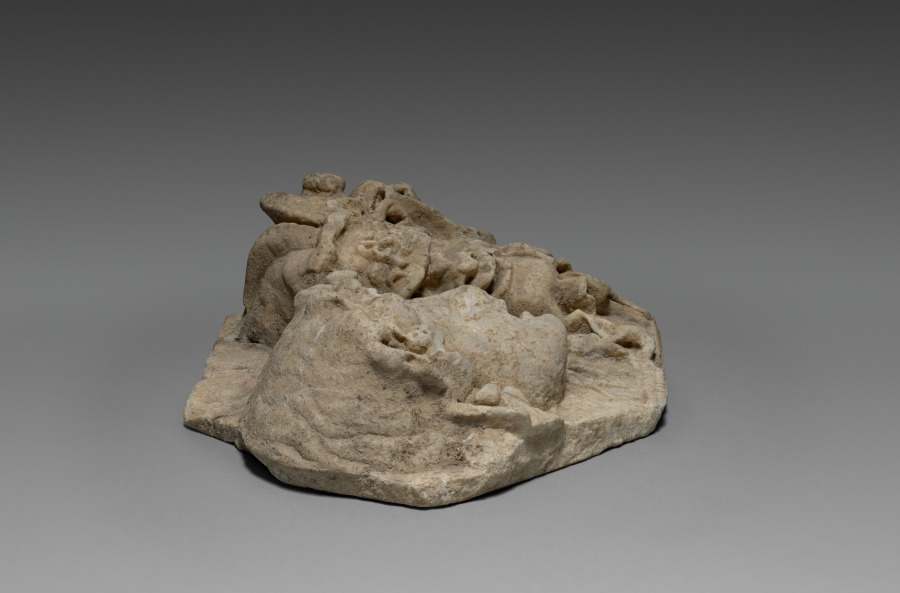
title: Two Masks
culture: Italy, Roman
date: 200s CE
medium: marble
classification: Sculpture